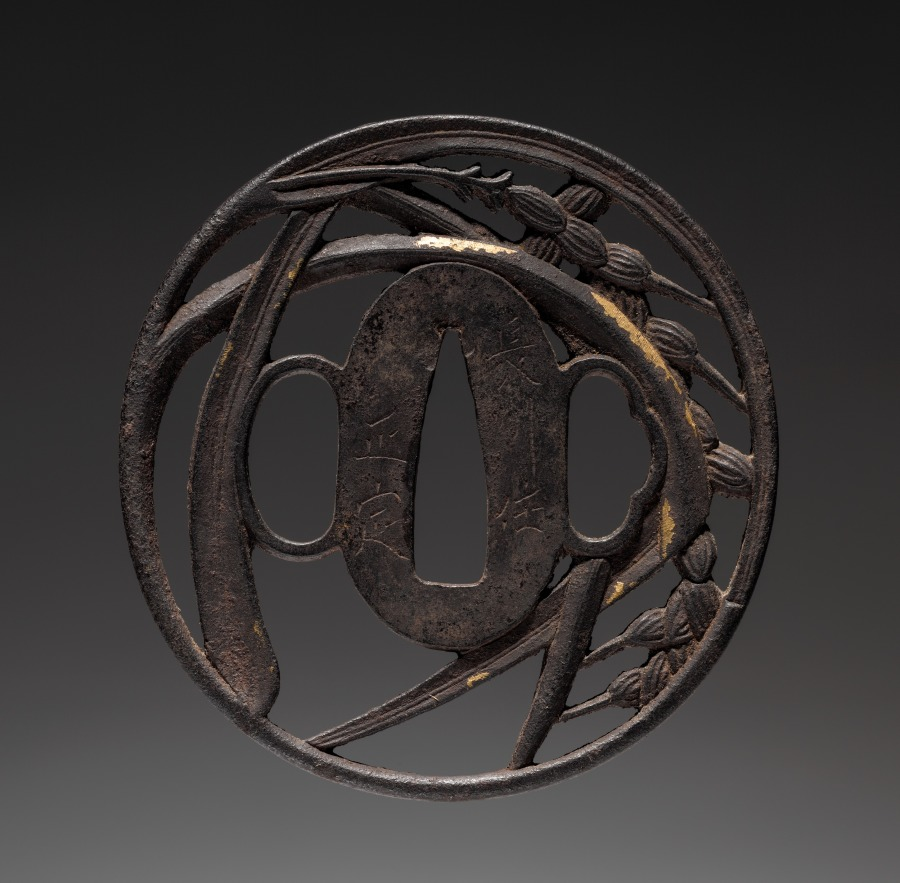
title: Sword Guard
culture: Japan, Edo period (1615–1868)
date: early 1800s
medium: iron (Choshu type)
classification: Arms and Armor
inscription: signed "Masasada, residing in Nagato province."